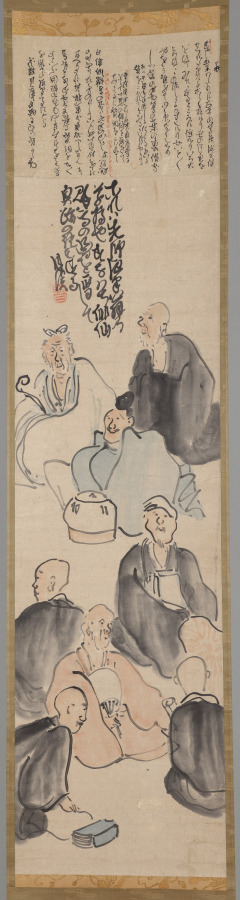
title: Gathering of Poetic Immortals with Poem Drafts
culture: Japan, Edo period (1615–1868)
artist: Matsumura Goshun (Japanese, 1752–1811)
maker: and Yosa Buson (Japanese, 1716–1783)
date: late 1700s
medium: hanging scroll; ink and color on paper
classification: Painting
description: When Yosa Buson died, his students raised funds for his daughter Kuno’s second marriage by selling their own paintings and calligraphies attached to surviving drafts of Buson’s poetry and commentary. Here, beneath a section of Buson’s manuscripts, Matsumura Goshun painted nine of the poets Buson judged to be the best at haikai, a humorous form of poetry in which poets take turns contributing verses to a poem. In his inscription, Goshun explained that his choice of subject relates to the content of Buson’s text.